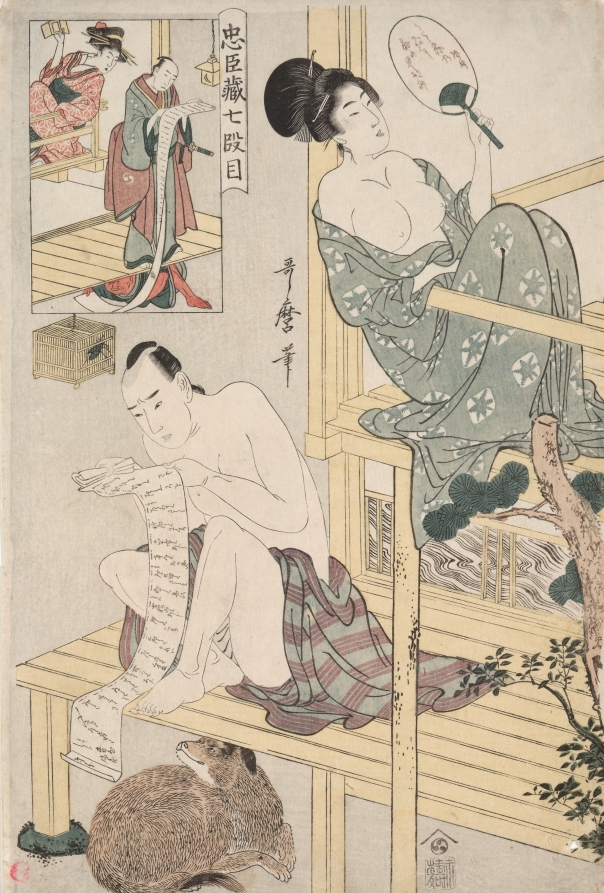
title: Act VII from the series The Storehouse of Loyal Retainers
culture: Japan, Edo period (1615–1868)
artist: Kitagawa Utamaro (Japanese, c. 1754–1806)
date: c. 1801–2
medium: Color woodblock print; ink and color on paper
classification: Print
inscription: Signature: Utamaro hitsu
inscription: Publisher: Nishimuraya Yohachi (Eiju han, emblem)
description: This series gives a famous play a humorous spin by altering the setting and some parts of the narrative. Utamaro kept his jokes accessible by picturing the action of the original episode to the side of the main image for easy reference. In this print, a spy reading a letter is turned into a dog; both can be pronounced inu in Japanese. In the stage version of this scene, the loyal samurai Oboshi Yuranosuke reads an important letter relating details of the plot to avenge the unjust death of his master. The spy Kudayu also reads the note as it unrolls beneath the veranda. On the balcony, the jealous courtesan Okaru believes it to be a love letter from a rival. Utamaro transforms the spy/counterspy episode into a humorous scene on a warm night. A beau reads a love letter, its presence disturbing the dog lying underneath the veranda. On the balcony above, a bored courtesan shows no interest in the scene below as she fans herself to keep cool.